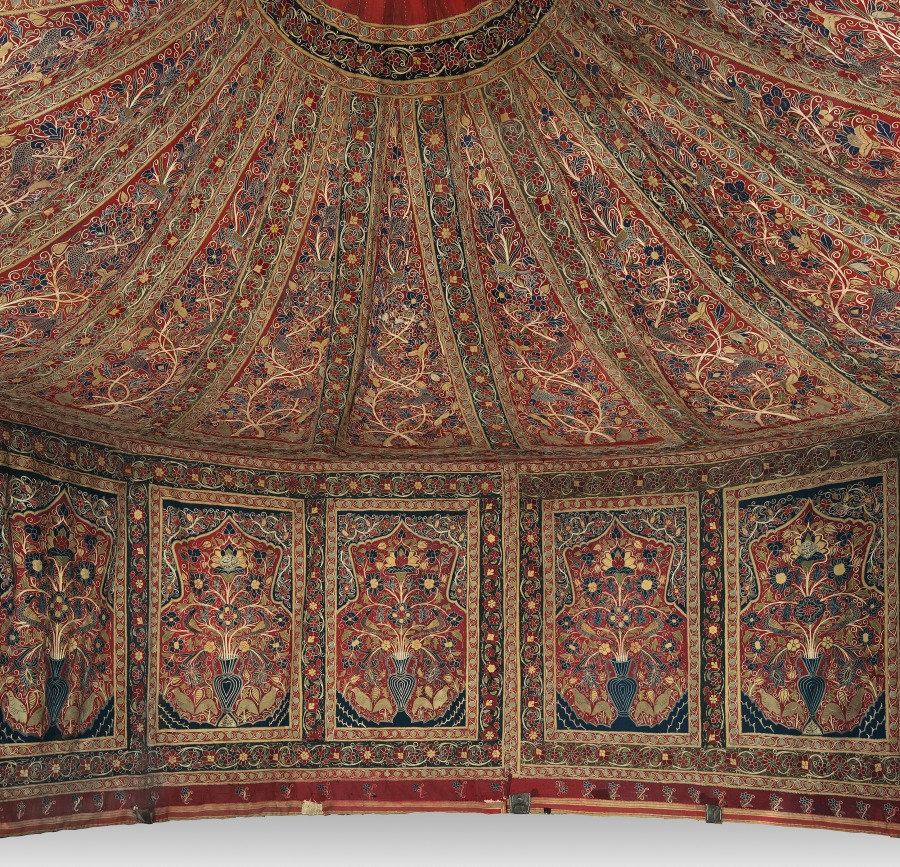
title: Royal Round Tent Made for Muhammad Shah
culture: Iran, Rasht, Qajar period (1779-1925)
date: 1834–48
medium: Interior: wool: plain weave, inlaid work; silk: embroidery, chain stitch; tape, leather; Exterior: cotton, wool: plain weave; rope, iron ring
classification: Textile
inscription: Inscriptions: The central design unit of panel 2014.388.2 and 2014.388.4 has two embroidered inscriptions. 1. Upper inscription (center of the top blossom): "Muhammad shah sultan-e ghazi."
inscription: 2. Lower inscription (on the base of the vase): "Kamtarin bandeh-ye dargah fath'ali."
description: Royal tents were potent symbols of authority, wealth, and power throughout the greater Middle East. Rulers owned thousands of tents. They were used for shelter, shade, and innumerable functions in tent compounds that were essential for imperial ceremonies, travel, and military campaigns. Distinguished by size with elaborately decorated interior walls and ceilings, tents could be as large as castles. Opulent tents were also presented as imperial gifts. Tents are only known through documents before 1600. For example, in Baghdad in 809, Caliph Harun al-Rashid owned 4,000 ceremonial tents and 150,000 camping tents that were stored in the imperial Abbasid treasury. An astonishing variety and quantity of tents were housed in the royal Fatimid tent storeroom in Cairo in 1068–69, including "military tents, fortress tents, and castle tents, manufactured of . . . gold-brocaded stuff embroidered with designs of elephants, wild beasts, horses, peacocks, birds." Since 1600, Ottoman Turkish tents with elaborate floral decoration have been preserved in Istanbul in the Topkapi Palace Museum and Military Museum, and in European collections as war booty, primarily from the Ottoman Turks' attempt to conquer Vienna in 1683. These tents are not done in the Rasht technique, but rather are appliqué. In contrast, royal tents from Iran are extremely rare. This spectacular ceremonial tent is embroidered with the name of its owner, Muhammad Shah, who ruled Iran from 1834 to 1848 during the Qajar dynasty. The radiant jewellike interior features exuberant flora, blossoming vines, and robust birds made with colored wool embellished with silk-thread embroidery.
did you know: Rasht work is named after the city on the Caspian Sea in present-day Iran, which was a major silk trade center with numerous textile workshops.